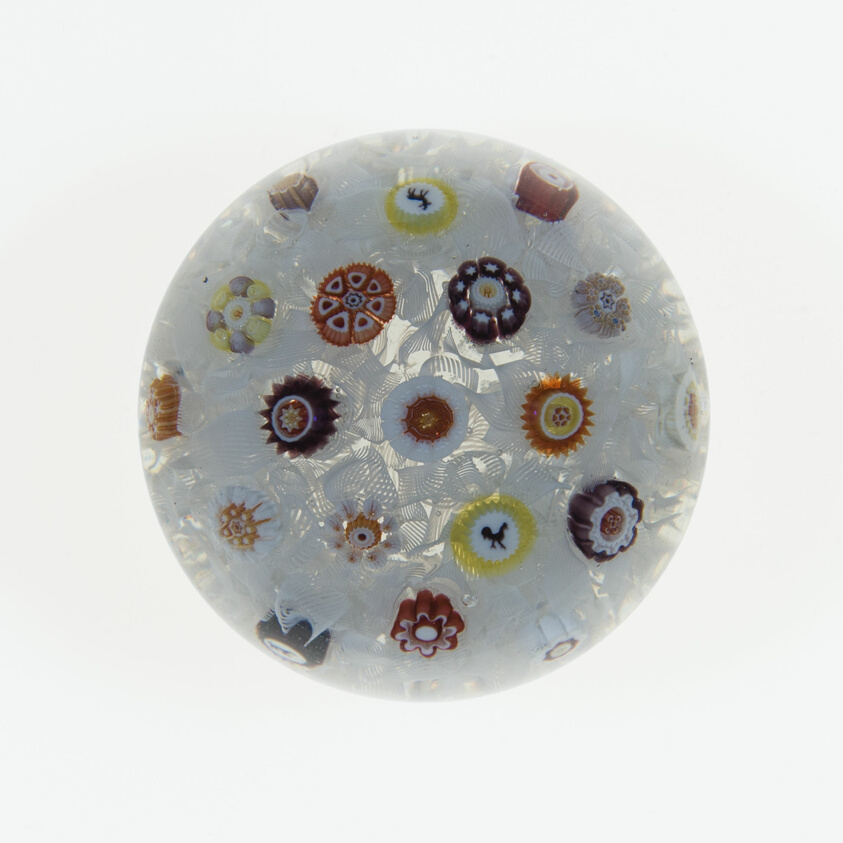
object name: Glass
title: Paperweight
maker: Baccarat Glassworks (Cristalleries de Baccarat); Lorraine, France, founded 1764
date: c. 1846–55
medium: Glass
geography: Lunéville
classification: paperweight; millefiori; european decorative arts; glass